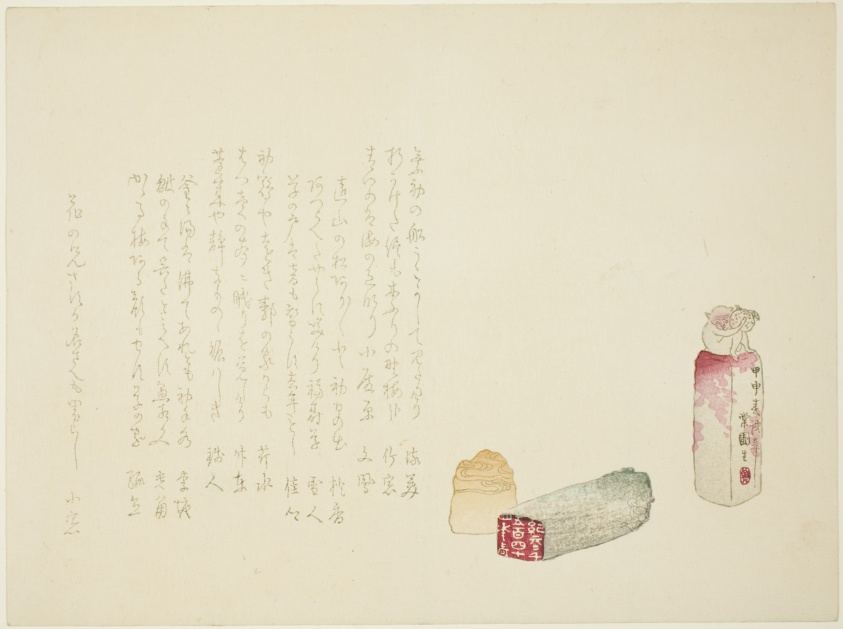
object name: Print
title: The Monkey Seal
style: Japanese (culture or style)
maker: Osa Toho (Japanese, active late 19th century)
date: spring 1884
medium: Color woodblock print; surimono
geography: Japan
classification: woodblock print; print; asian art